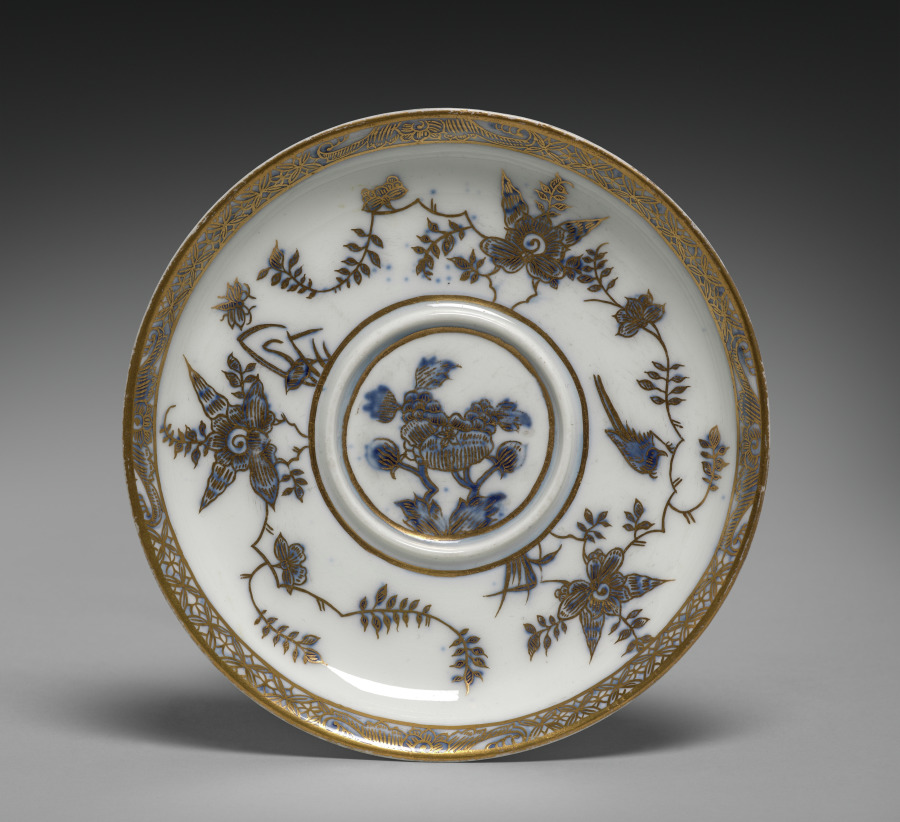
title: Stand for a Covered Broth Bowl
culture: Germany, Meissen, 18th century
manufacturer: Meissen Porcelain Factory (German, est. c. 1710)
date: 1730–40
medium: gilt porcelain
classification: Ceramic